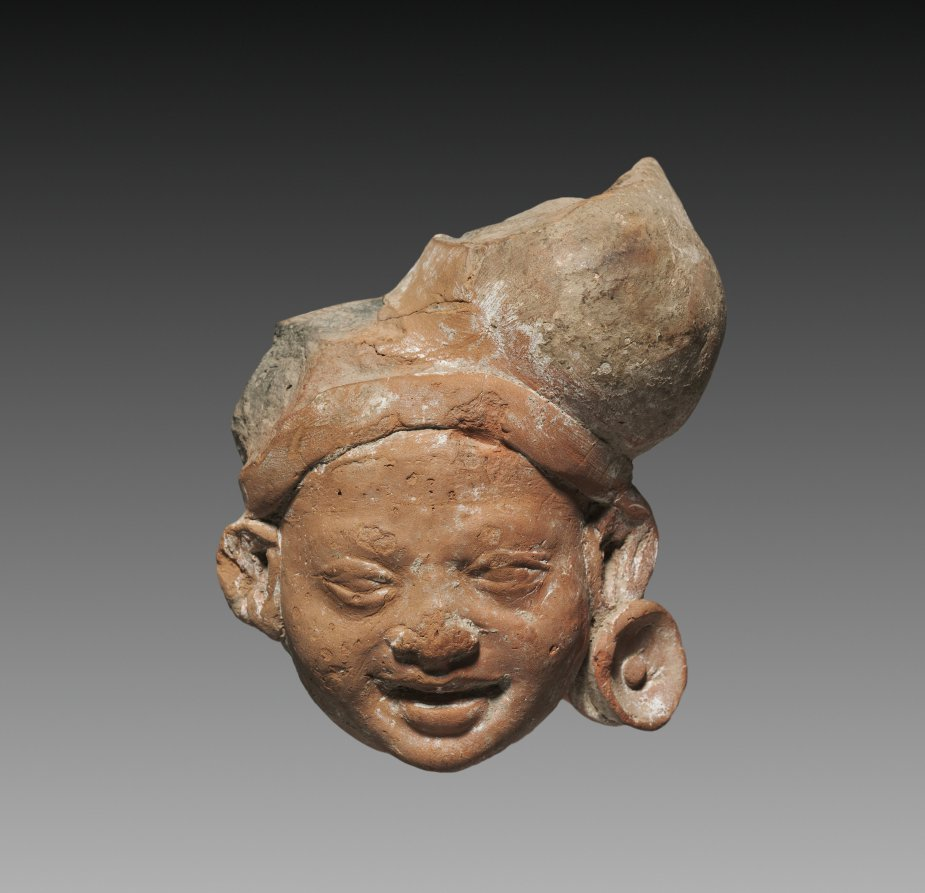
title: Male Head, possibly a Yaksha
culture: Northeastern India, Bihar, Patna, Bulandibagh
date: 300s BCE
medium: terracotta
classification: Sculpture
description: The large turban and earring suggest that this head may have belonged to a yaksha, a nature divinity worshipped for wealth and prosperity. The small scale and terracotta material imply that it may have been installed on a domestic shrine. The naturalism of the fleshy face and parted mouth are stylistic features of sculptures from the Maurya period, and this work was found at the Maurya capital of Pataliputra.